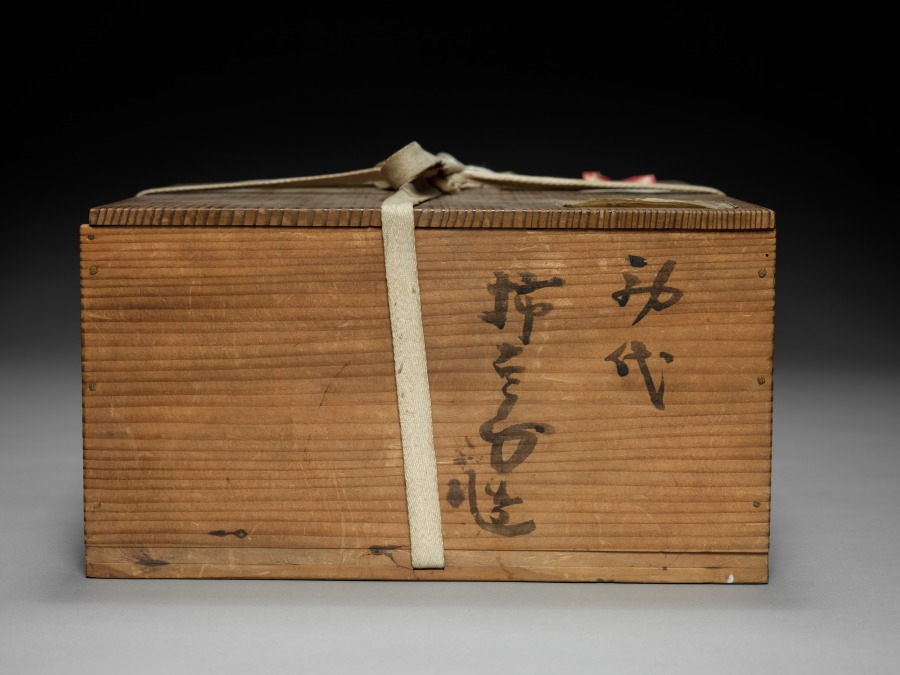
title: Bowl with Lion and Flowers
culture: Japan, Edo period (1615–1868)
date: 1700s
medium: porcelain, molded, with underglaze blue and overglaze color enamel (Hizen ware, Kakiemon type)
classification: Ceramic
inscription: 金